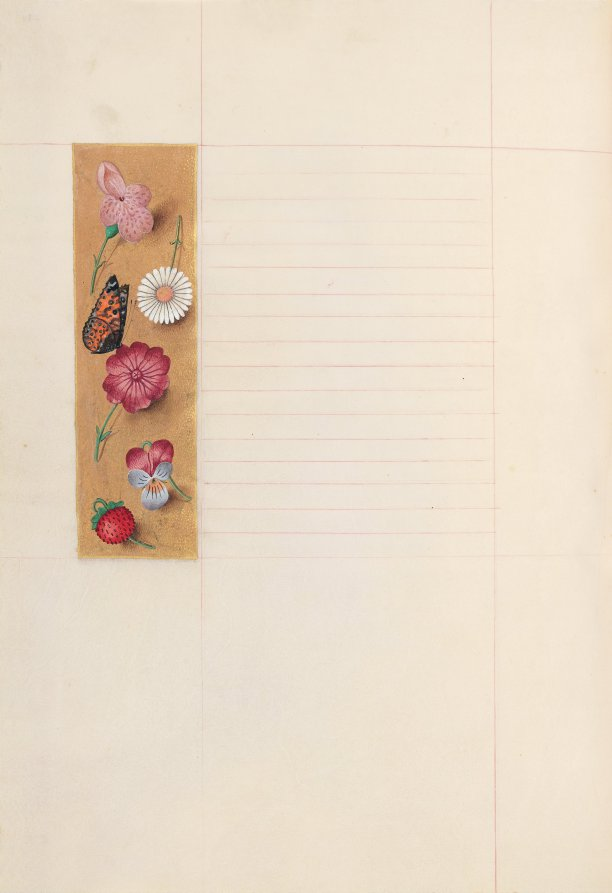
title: Hours of Queen Isabella the Catholic, Queen of Spain: Fol. 270v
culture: Flanders, Ghent and Bruges, late 15th century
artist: Master of the First Prayerbook of Maximillian (Flemish, c. 1444–1519)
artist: and Associates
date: c. 1500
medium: ink, tempera, and gold on vellum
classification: Bound Volume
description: This manuscript was illuminated by a circle of at least five highly organized manuscript painters active in the Flemish cities of Ghent and Bruges. The principal illuminator was Alexander Bening, who painted the majority of the book's miniatures. Manuscripts produced by this circle of artists are renowned for the decoration of their borders, which typically feature a rich variety of realistically-painted flowers, birds, and butterflies. This prayer book, called a book of hours, was intended not for a cleric, but for the private devotions of a lay person-in this case, Isabella the Catholic, Queen of Spain (1451-1504). Isabella's coat of arms embellishes the book's frontispiece. It is unlikely that the book was commissioned by the Queen herself; rather, she probably received it as a diplomatic gift from someone courting her patronage, perhaps Cardinal Francisco Jimenez de Cisneros. A Franciscan friar, Jimenez was dependent upon Isabella for his advancement, first to the post of Queen's confessor in 1492, and then to Archbishop of Toledo in 1495.